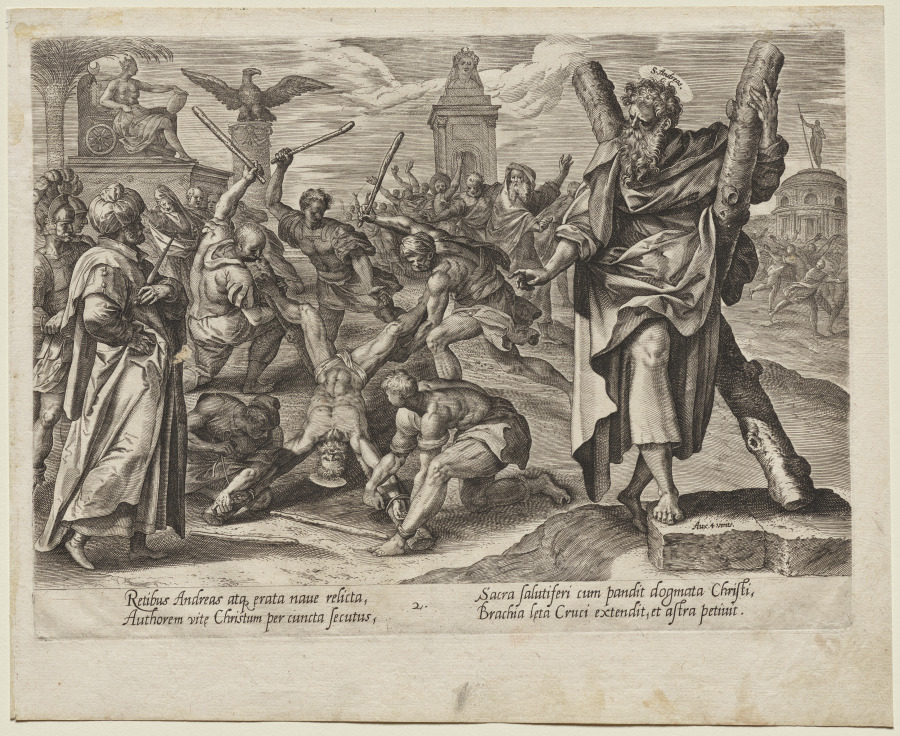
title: St. Andrew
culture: Netherlands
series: Christ, St. Paul, and the Twelve Apostles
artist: Hendrick Goltzius (Dutch, 1558–1617)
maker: after Maarten de Vos (Flemish, 1532–1603)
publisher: Aux Quatre Vents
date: c. 1578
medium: engraving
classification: Print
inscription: Aux.4.vents. lower right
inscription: Verses in lower margin: Retibus Andreas atq[ue]…astra petiuit. In nimbus S. Andreas. Numbered 2